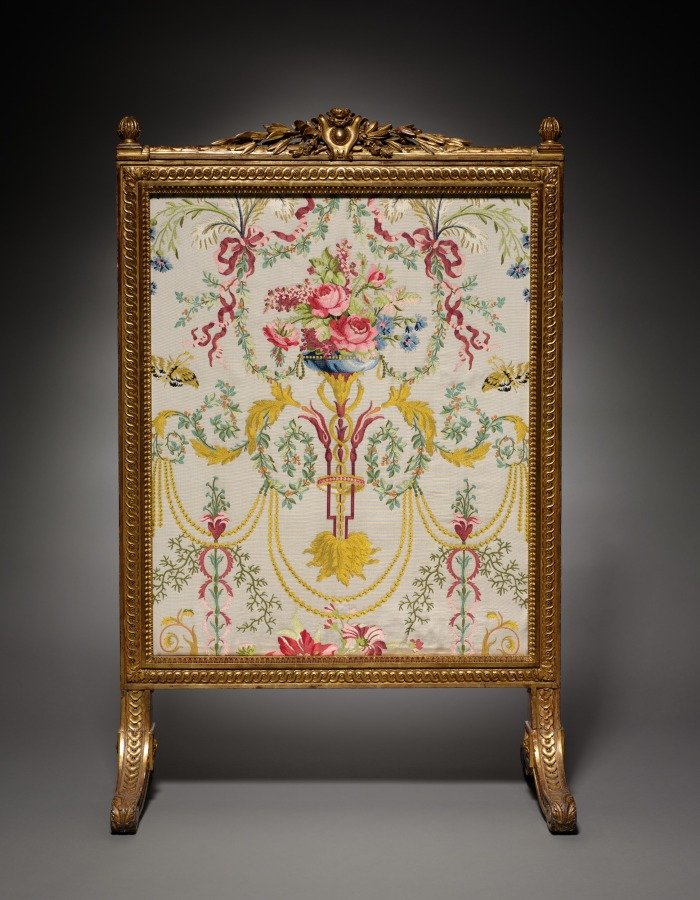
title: Fire Screen (Écran de Cheminée)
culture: France, Paris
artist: Georges Jacob (French, 1739–1814)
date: c. 1780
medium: gilt wood, upholstery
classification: Furniture and woodwork